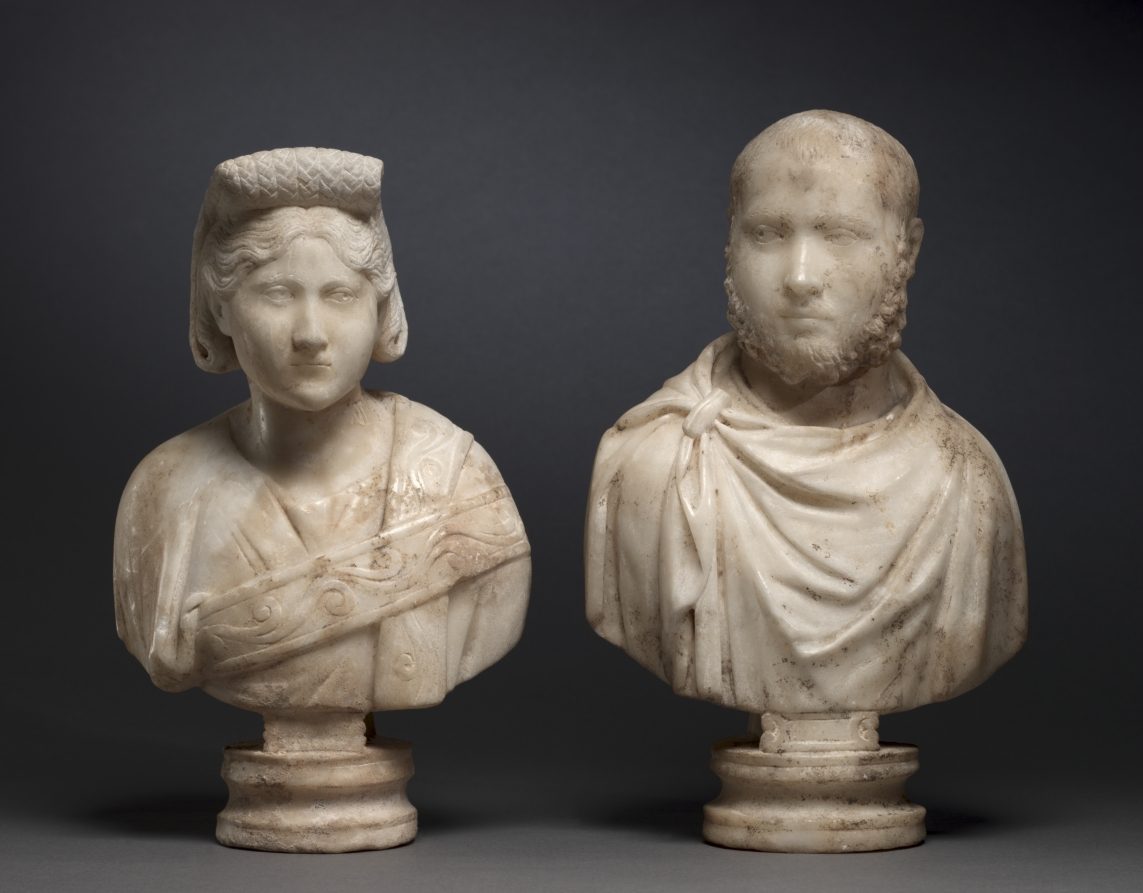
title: Portrait Bust of an Aristocratic Man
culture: Anatolia, late Roman-early Christian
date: 280–90 CE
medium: marble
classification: Sculpture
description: These three pairs of marble portrait busts depict an aristocratic Roman couple. They are unique in representing the same couple three times with only minor variations in costume. Allegedly found together with the Jonah Marbles, they may represent the Christian patrons who commissioned the Jonah cycle.